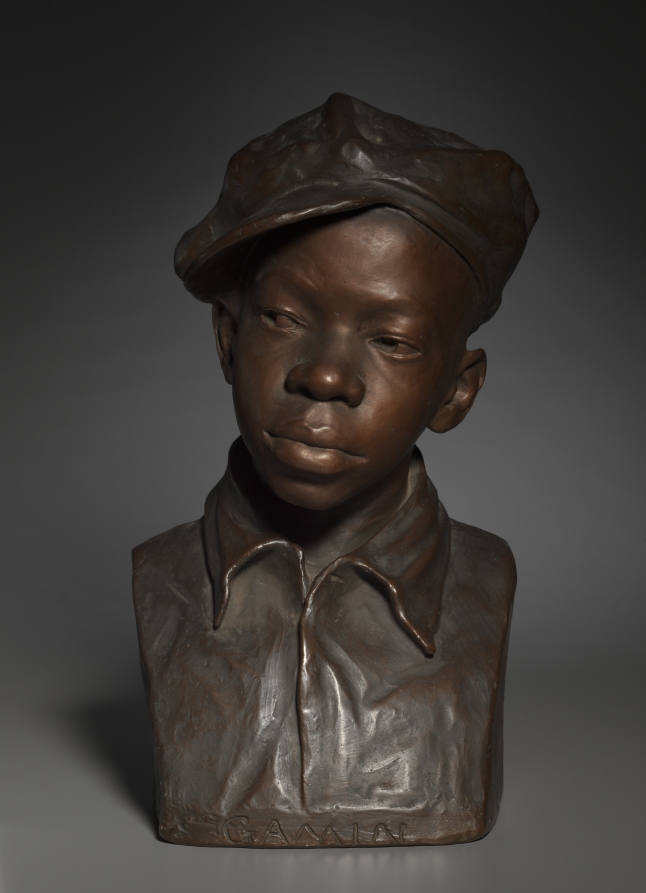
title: Gamin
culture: America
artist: Augusta Savage (American, 1892–1962)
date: c. 1929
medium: hand-painted plaster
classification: Sculpture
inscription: signed on right-side: "Savage"; titled across the bottom-front: "Gamin"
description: Augusta Savage was the most acclaimed sculptor working during the Harlem Renaissance of the 1920s and ‘30s, and Gamin is her most famous work. It was long thought that the image was a generic figure; however, recent research reveals that it depicts her nephew. The warm characterization likely arises from the close bond shared between artist and model. Although several small versions of the sculpture were produced, this life-size, hand-painted plaster is unique, and likely the oldest surviving example of the subject.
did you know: A trailblazer, Savage was the first African American member of the National Association of Women Artists.